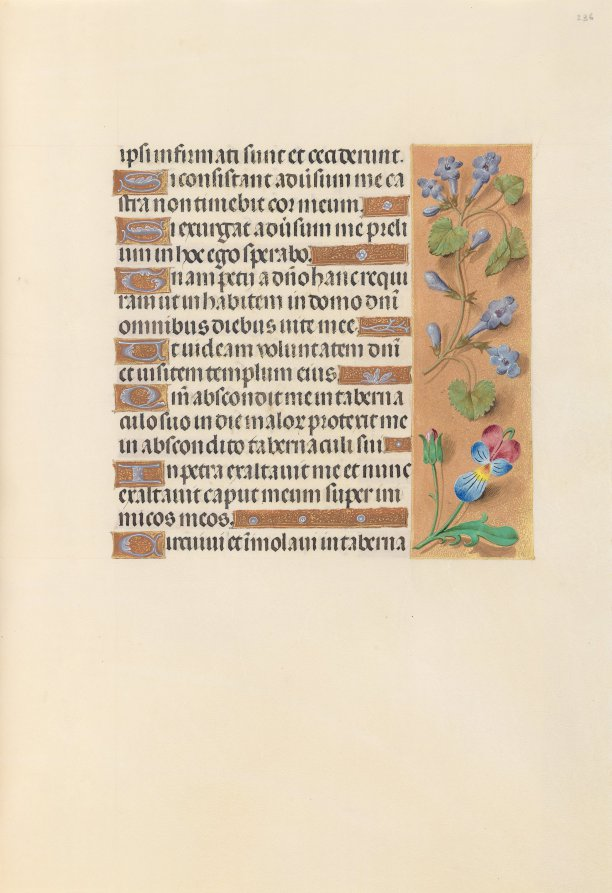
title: Hours of Queen Isabella the Catholic, Queen of Spain: Fol. 236r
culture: Flanders, Ghent and Bruges, late 15th century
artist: Master of the First Prayerbook of Maximillian (Flemish, c. 1444–1519)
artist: and Associates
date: c. 1500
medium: ink, tempera, and gold on vellum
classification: Bound Volume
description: This manuscript was illuminated by a circle of at least five highly organized manuscript painters active in the Flemish cities of Ghent and Bruges. The principal illuminator was Alexander Bening, who painted the majority of the book's miniatures. Manuscripts produced by this circle of artists are renowned for the decoration of their borders, which typically feature a rich variety of realistically-painted flowers, birds, and butterflies. This prayer book, called a book of hours, was intended not for a cleric, but for the private devotions of a lay person-in this case, Isabella the Catholic, Queen of Spain (1451-1504). Isabella's coat of arms embellishes the book's frontispiece. It is unlikely that the book was commissioned by the Queen herself; rather, she probably received it as a diplomatic gift from someone courting her patronage, perhaps Cardinal Francisco Jimenez de Cisneros. A Franciscan friar, Jimenez was dependent upon Isabella for his advancement, first to the post of Queen's confessor in 1492, and then to Archbishop of Toledo in 1495.